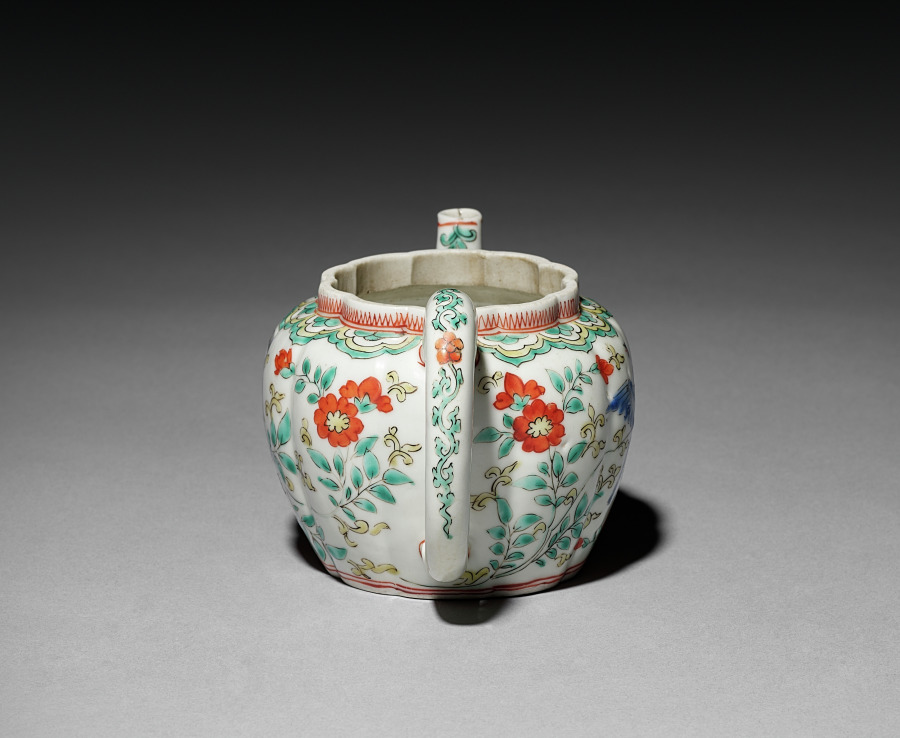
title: Teapot with Birds and Flowers (base)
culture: Japan, Edo period (1615–1868)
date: 1700s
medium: Porcelain with overglaze color enamel (Arita ware)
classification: Ceramic